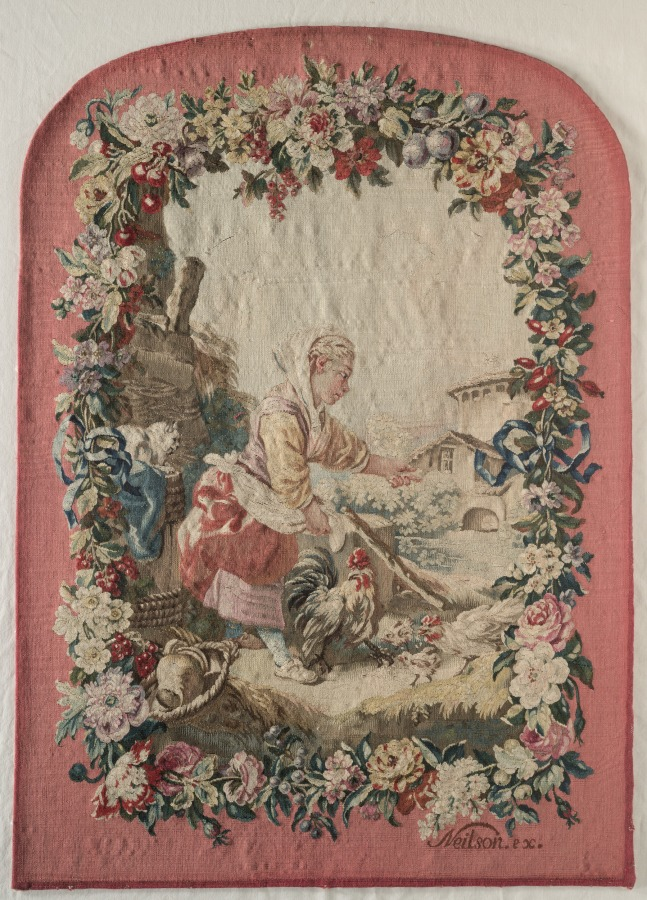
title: Fire Screen Panel and Frame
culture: France, 18th century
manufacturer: Gobelins Manufactory (France, Paris, est. 1662)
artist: after a design by Jean-Baptiste Marie Hüet (French, 1745–1811)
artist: after a design by Maurice Jacques (French, 1712–1784)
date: c. 1775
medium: tapestry weave: silk and wool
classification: Textile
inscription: lower right: "Neilson. ex.."